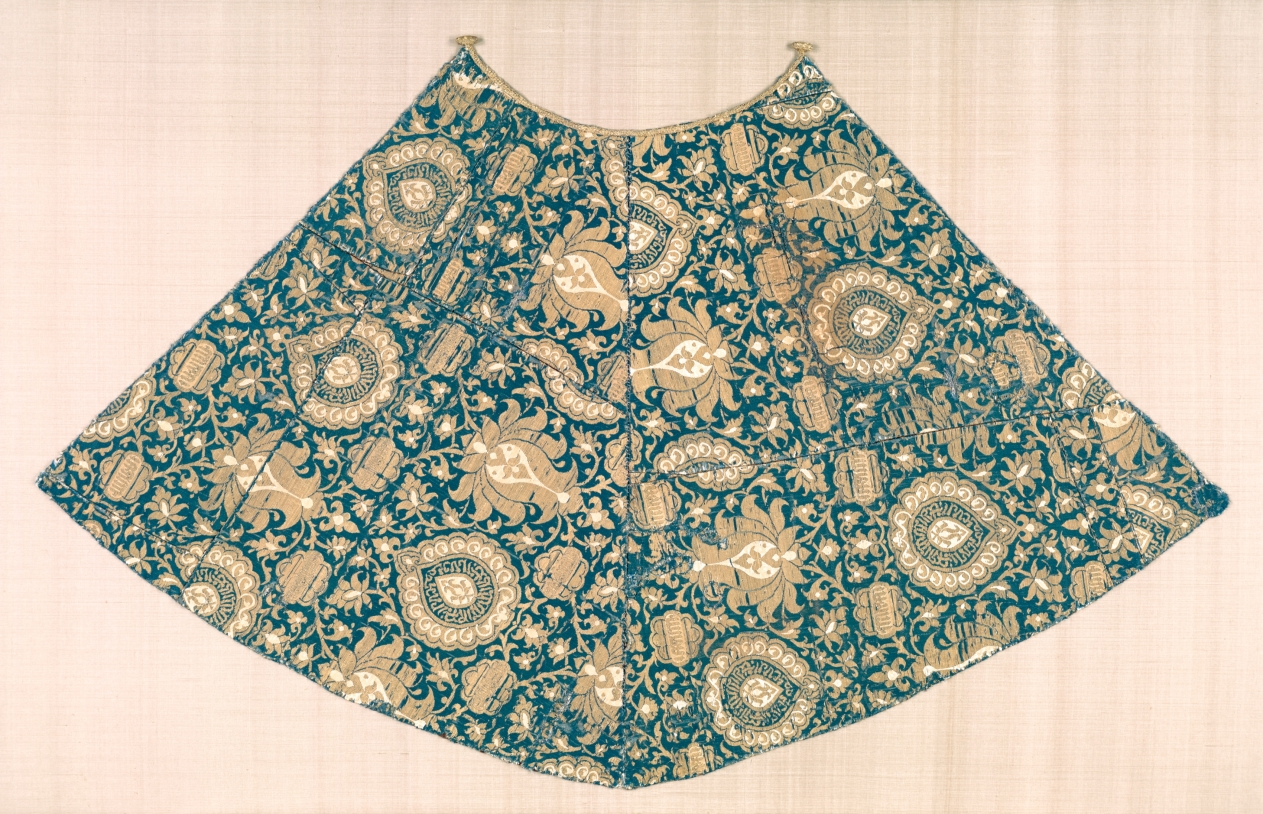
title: Mantle for a Statue of the Virgin with Lotus Blossoms and Medallions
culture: Egypt and Spain; Egypt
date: c. 1430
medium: Silk and gilt-metal thread: lampas weave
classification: Textile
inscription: Glory to our master, the sultan, the king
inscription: The sultan, the king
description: This costly royal silk with extensive gold thread was woven in Egypt and gifted or exported to Spain, where it was pieced into this mantle for a statue of the Virgin, probably to be worn during festivals and processions. The sturdy silk brocade foundation cloth was also woven with a lighter weight silk damask with a repeating mirror image. Therefore, the Arabic inscription in the medallions reads both forward and backward: Glory to our master, the sultan, the king. The inscribed lobed roundels say The sultan, the king.